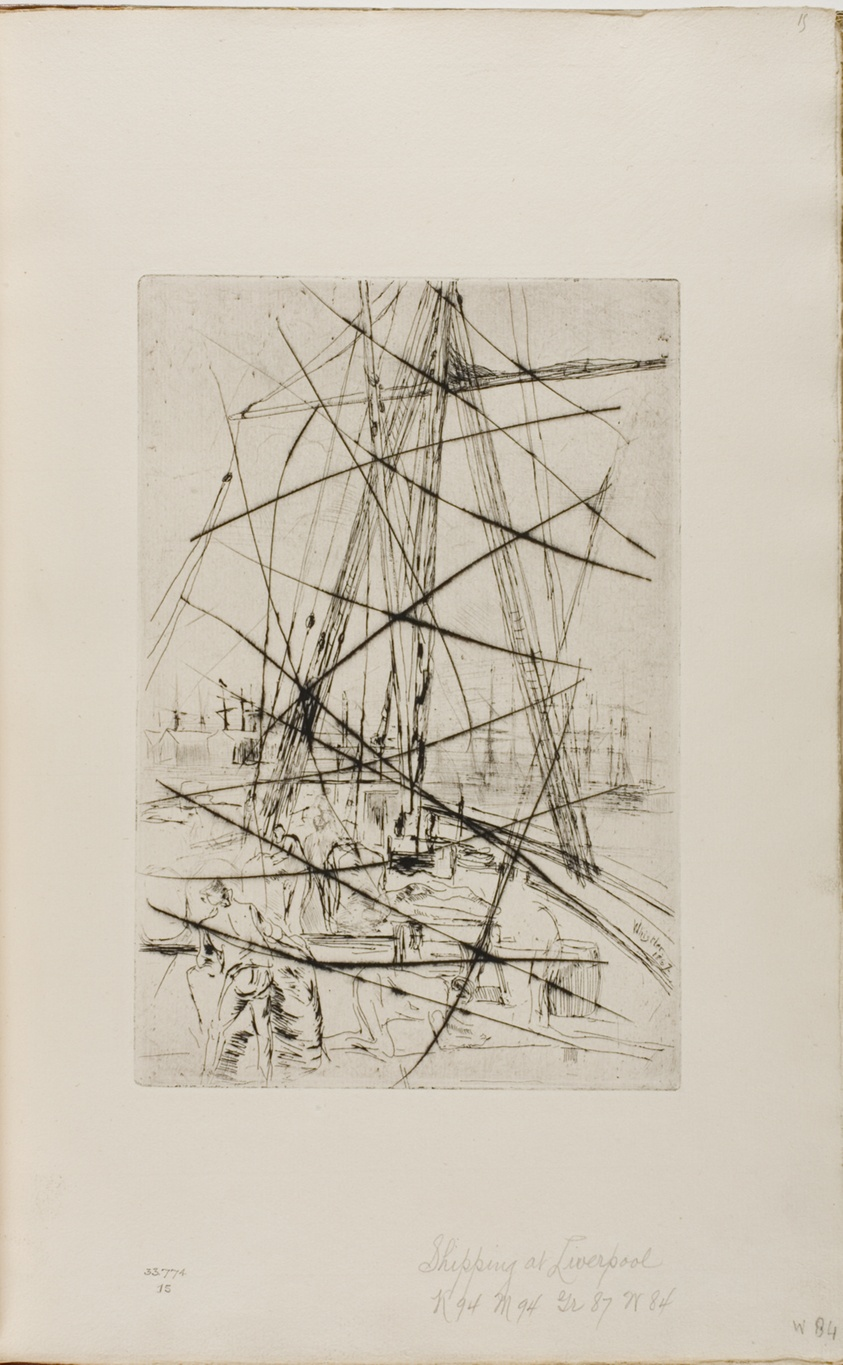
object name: Print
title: Shipping at Liverpool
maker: James McNeill Whistler (American, 1834-1903)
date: 1867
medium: Etching and drypoint, with drypoint cancellation, in black ink on ivory laid paper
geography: United States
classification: etching; print; prints and drawing; book; drypoint; paper